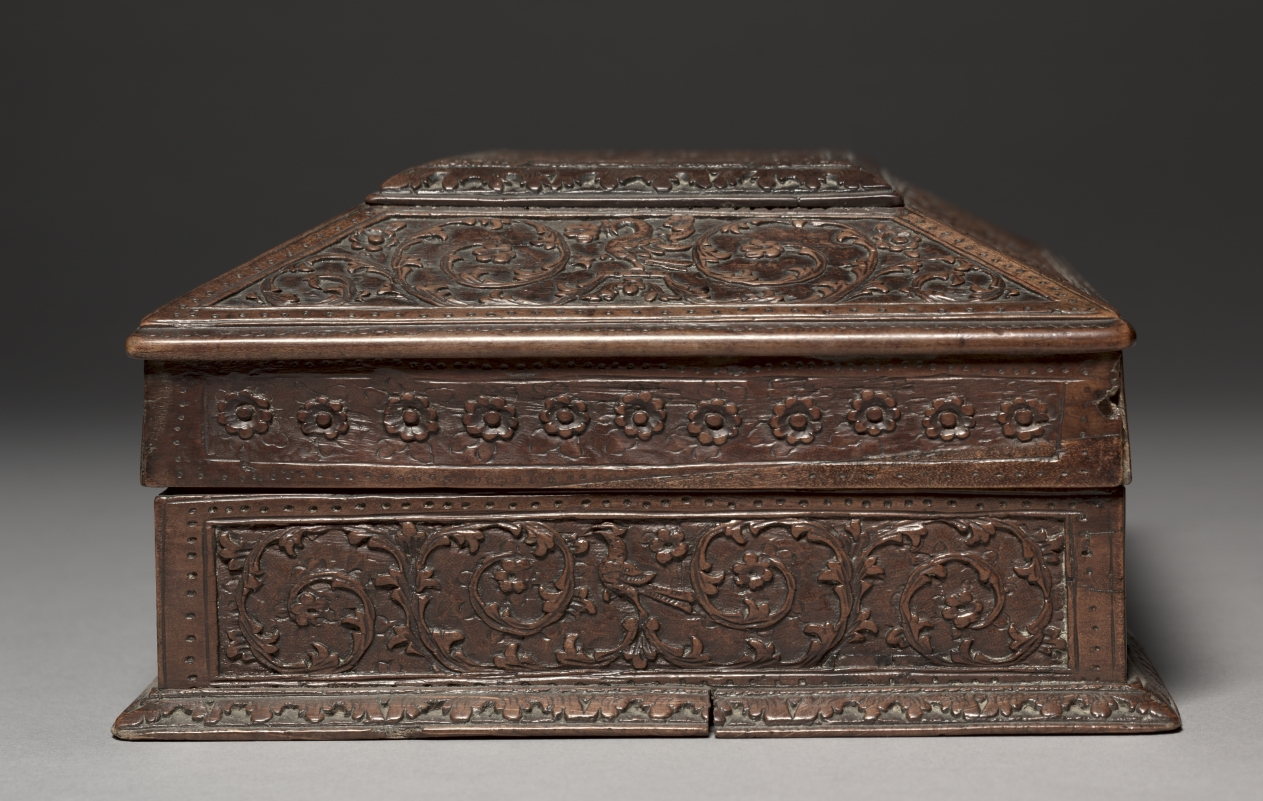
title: Box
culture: France, late 17th century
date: late 1600s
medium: wood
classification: Furniture and woodwork